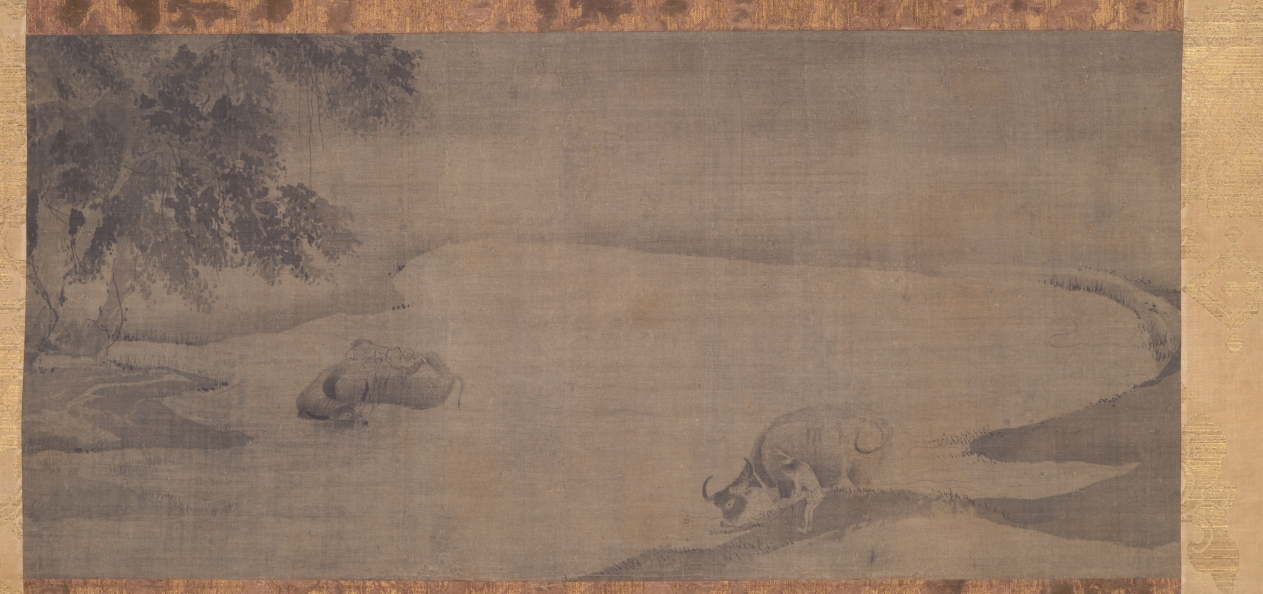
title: Water Buffalo and Herdboys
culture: China, Yuan dynasty (1271-1368)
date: late 1200s–early 1300s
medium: Hanging scroll; ink on silk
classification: Painting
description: In southern China, farmers use water buffalos to help plow their fields, which children often tend. In Buddhist teachings, the subject of herding or taming an ox was used to illustrate the 10 steps to enlightenment, or spiritual awakening. A single image may be read as a metaphorical representation of the Chan process of attaining enlightenment, the difficulty of which was likened to that of finding a strayed buffalo. Here, a buffalo is watered by a boy, another takes a bath in the pond. Chan paintings introduced to Japan were often remounted to fit them into niches for display (tokonoma), which explains the painting’s current format.